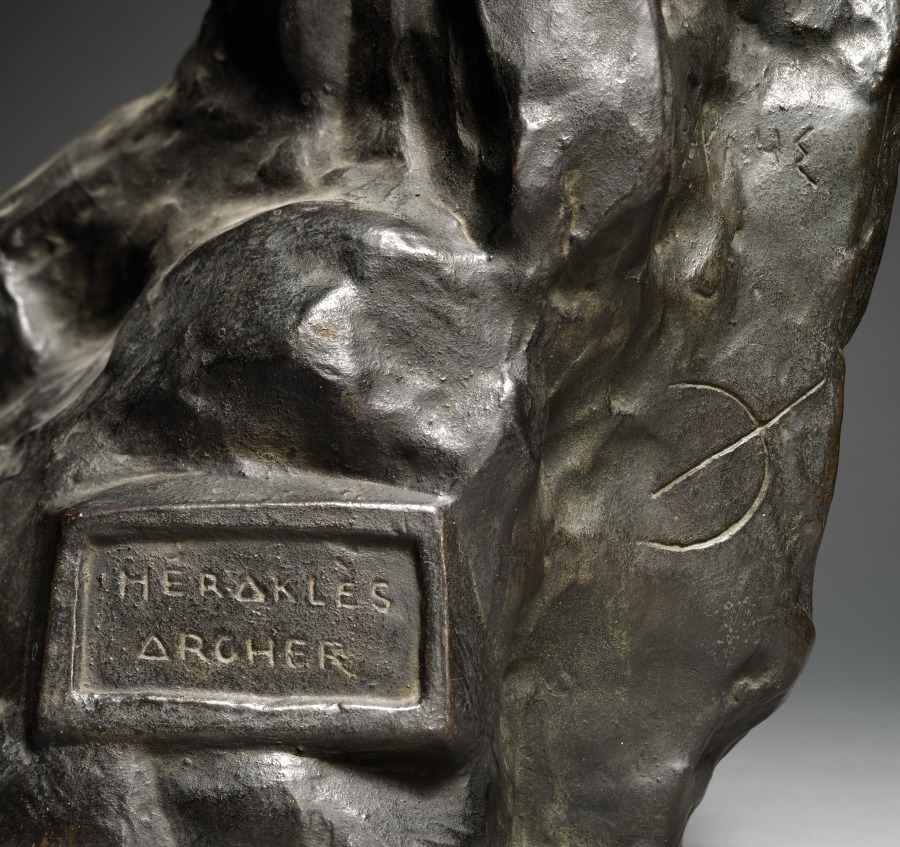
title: Herakles the Archer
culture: France, 19th century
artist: Emile Antoine Bourdelle (French, 1861–1929)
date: 1908–9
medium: bronze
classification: Sculpture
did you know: The model who posed for this sculpture was Major Paul Gustave André Doyen-Parigot, an accomplished sportsman and military commander, who was later killed during World War I in the Battle of Verdun.